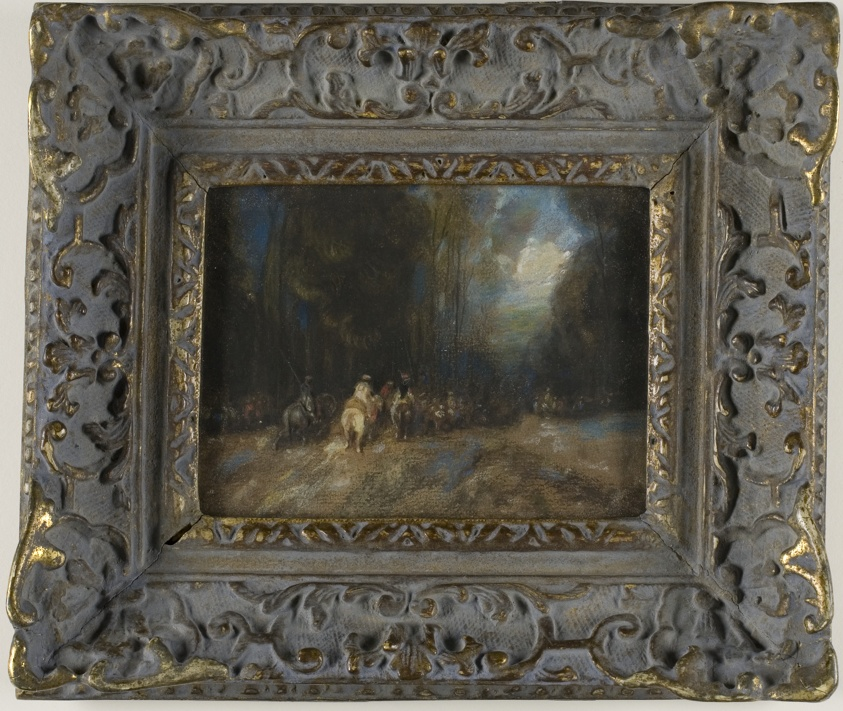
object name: Drawing and Watercolor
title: Riders on Horseback in Woods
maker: Unknown Artist; French, 18th century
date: 18th century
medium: Pastel, with touches of binder-rich media (possibly oil), on tan laid paper laid down on paperboard, framed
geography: France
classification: oil paintings (visual works); drawings (visual works); prints and drawing